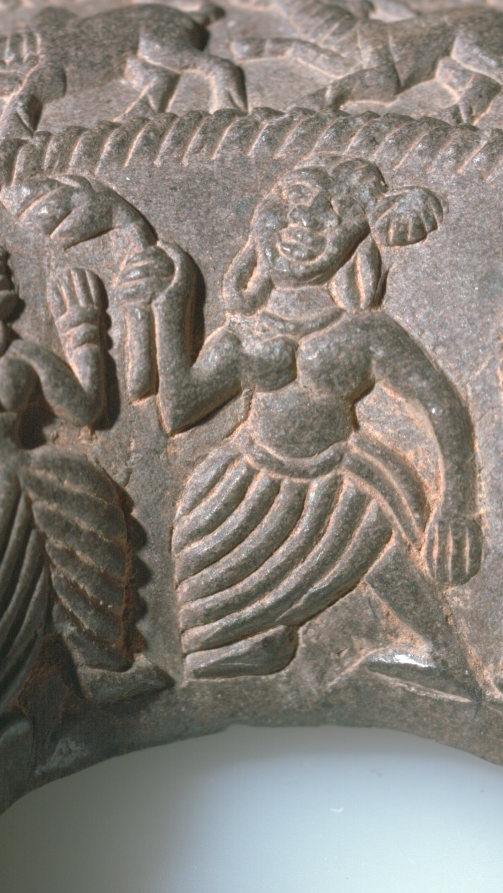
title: Ringstone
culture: India, Maurya period (322–185 BCE)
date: 200s BCE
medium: steatite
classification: Sculpture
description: Ringstones are among the earliest works of art to be created in stone during India's historical period. This example is finely carved with detailed images of affectionate couples and palm trees, running animals, and geometric motifs in concentric circles. The function of ringstones remains uncertain, since none of the surviving examples is inscribed or explained in a text.